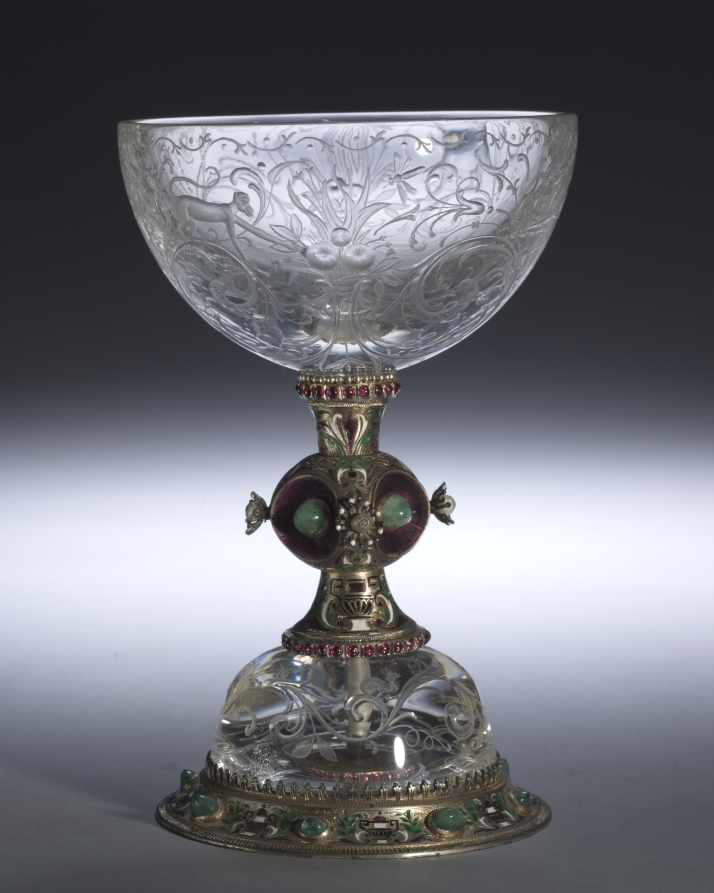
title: Chalice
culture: Austria, Vienna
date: c. 1850–75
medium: rock crystal, gilded and enameled silver, pearls, emeralds, precious stones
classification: Miscellaneous